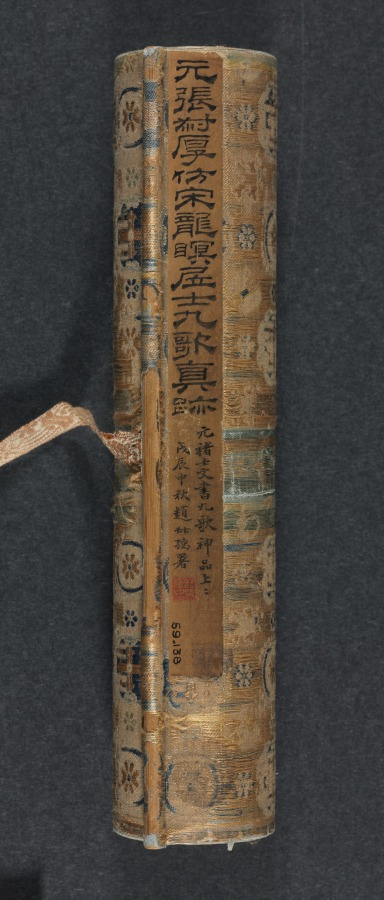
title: Nine Songs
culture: China, Yuan dynasty (1271-1368)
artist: Zhang Wo (Chinese, active c.1336–after 1364)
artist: Chu Huan (Chinese, active 1361)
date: 1361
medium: handscroll; ink on paper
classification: Painting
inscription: 7 colophons and 47 seals: 1 colophon, dated 1361, and 28 seals of Chu Huan 褚奐 (active c. 1361); 1 colophon, dated 1785, and 1 seal of Lu Shihua 陸時化 (1714-1779); 2 seals of Lu Yü-ch'ing (18th c.); 1 colophon, dated 1935, of Ye Gongchuo 葉恭綽 (1881-1968); 1 colophon, dated 1935, of Wu Hufan 吳湖帆(1894–1968); 1 colophon, dated 1938, and 1 seal of Wang Tongyu 王同愈 (1856-1941); 1 colophon, dated 1941, of Wu Huayuan 吳華源 (1893-1972); 1 colophon, dated 1942, and 9 seals of Xu Bangda 徐邦達 (1911–2012); 1 colophon, dated 1942, of Lang Jingshan 郎靜山 (1892-1995); 1 colophon, dated 1944, of Tang Yun 唐雲 (1910-1993); 6 seals of Wang Jiqian [C.C. Wang] 王季遷 (1907–2003).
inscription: Text of The Nine Songs written by Chu Huan at the end of each section.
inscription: 右離騷九歌圖，宋龍溟居士李公本，淮南張渥叔厚所畫妙絕當世。家藏請予書其辭目識于左。至正二十一年辛醜三月旦河南褚奐記。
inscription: Colophon by Lu Shihua 陸時化 (1714–1789): This scroll is fortunate to have been handed down from collections of the right people. Now, after 500 years, its condition is as good as when it was painted. I acquired this from Mr. Shen Guiyu [1673-1769], the President of the Board of Rites. The label is in his handwriting when he was 95 years old. I submit that Chu Huan (t. Shiwen) of the Yuan Dynasty was a native of Qiantang. His "seal" and li writings are in the style of Wu Rui. For example, in [Chu Kuei's] Ming ji lu [A list of masterpieces] is recorded the stele commemorating the restoration of the prefectural school of Kun-shan, the text of which was composed by Yang Weizhen in the twenty-first year of Zhizheng [1361]; and the calligraphy as well as the title in li style was by Chu Huan, who was at that time an assistant judge of the prefecture of Haining in the circuit of Hangzhou. Zhang Wo's zi is Shuhou (叔厚). His literary name is Zhen Qisheng (贞期生). According to [Gu Ying's] Yu shan cao tang ya jii, he liked to paint in the bai-miao or the "pure delineation" style after the method of Li Longmian [Li Gonglin 李公麟], which finds no peer among the ancient masters. This is agreed upon [by Pei Ch'iung] in his Qing jiang zhi who praised [Zhang Wo] as being quite learned and well-versed in many branches of the arts, especially figure painting. Recorded by Lu Shihua [The mountain dweller], listening to the pine, in the twelfth month of the yisi year [1785].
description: Painted in the baimiao, or fine-line drawing style, this ancient work demonstrates the literati’s use of abstract calligraphic brushwork for self-expression. The subject of the “Nine Songs”—songs associated with shamanistic rituals in the ancient Chu kingdom—had traditionally provided artists with myths and legends that they could explore and reinterpret in their own works.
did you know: Divided into eleven sections, the scroll contains illustrations by painter Zhang Wu followed by a transcription of the relevant verse by calligrapher Chu Huan.